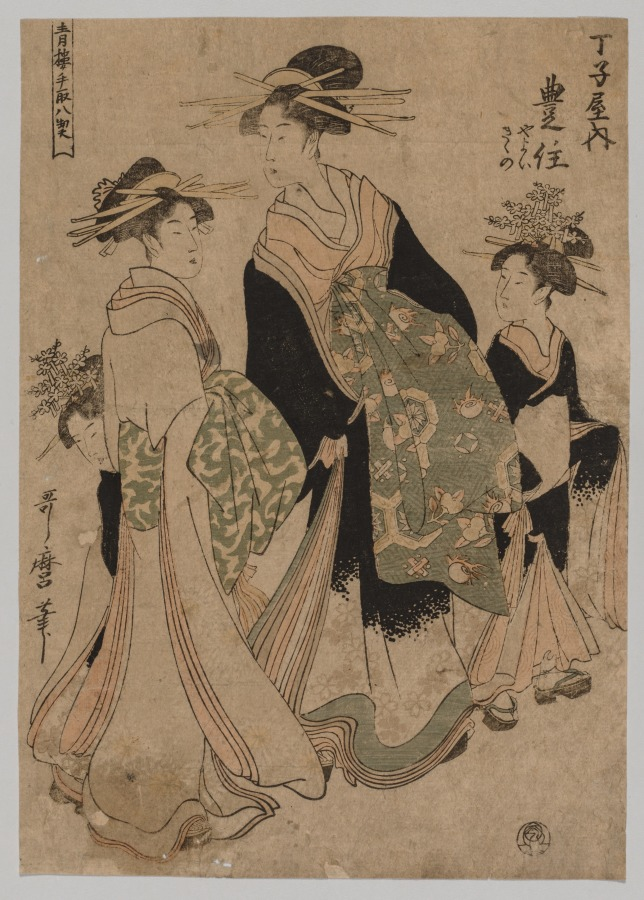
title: Courtesans and Attendants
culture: Japan, Edo period (1615–1868)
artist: Kitagawa Utamaro (Japanese, c. 1754–1806)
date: 1753–1806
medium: color woodblock print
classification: Print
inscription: Signature: Utamaro fude